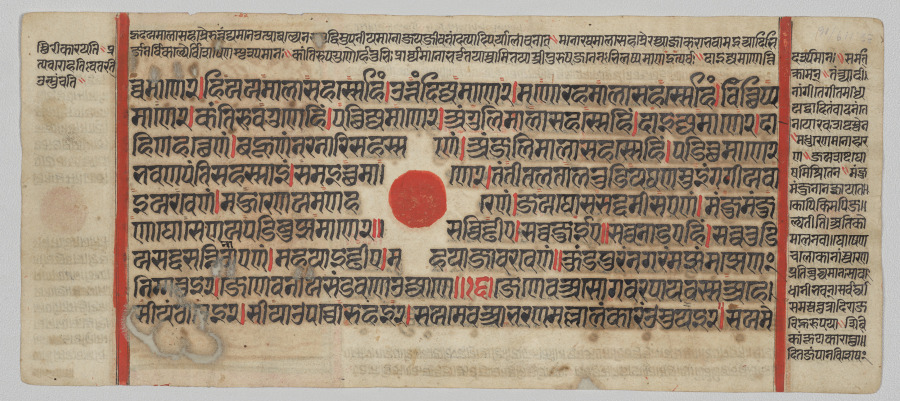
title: Text, Folio 37 (recto), from a Kalpa-sutra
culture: Western India, Gujarat, last quarter of the 15th century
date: c. 1475–1500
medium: Gum tempera, ink, and gold on paper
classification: Painting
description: When Mahavira chose to renounce his life as a prince to seek omniscience and ultimate liberation, he traveled from his palace to the countryside until he came to a wooded park. The text states that under an ashoka tree in the park, Mahavira removed his ornaments and garlands and plucked out his hair with his fists in five handfuls. In the illumination he unflinchingly grasps a fistful of hair, his pectoral muscle flexed with the effort. Indra, the four-armed king of the gods, sits under a royal canopy on a lower level than Mahavira and praises his extreme act of self-mortification. The dramatic moment is effectively conveyed through the pert and wiry line drawing and bold palette of pigments made from lapis lazuli, vermilion, and lavish amounts of gold.